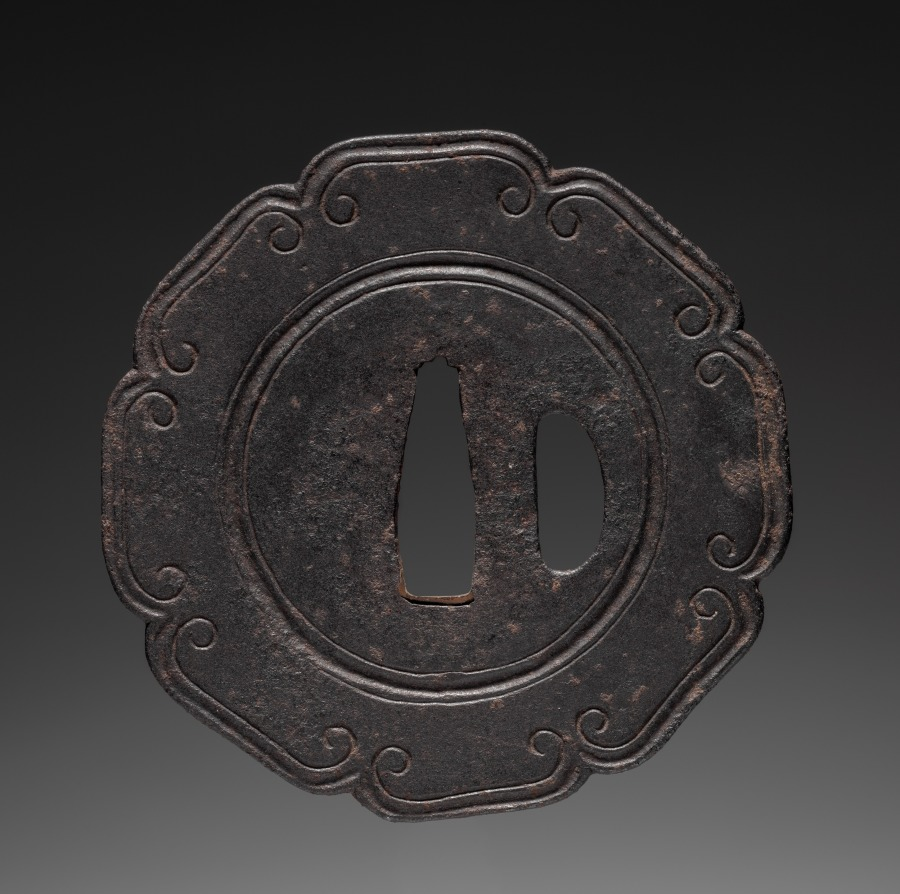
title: Sword Guard (Tsuba)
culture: Japan, possibly Edo period (1615-1868)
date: c. 1615–1868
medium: iron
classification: Arms and Armor